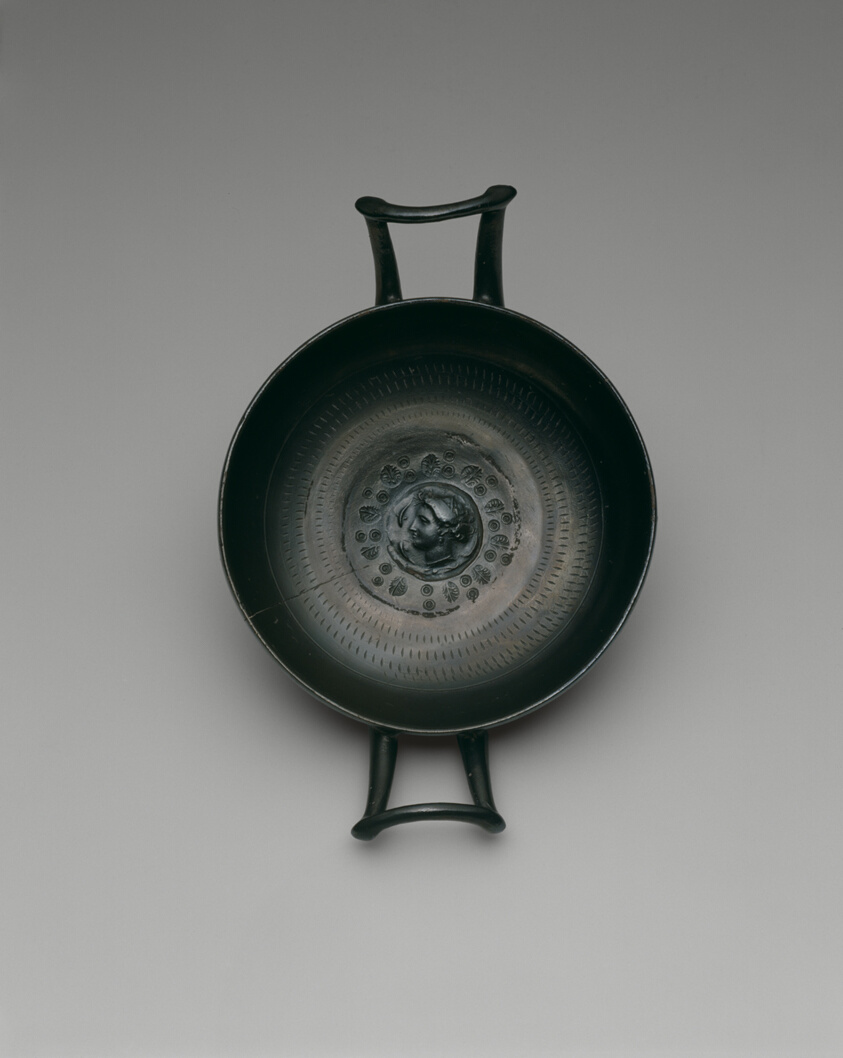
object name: Vessel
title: Stemless Kylix (Drinking Cup)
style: campanian, south italian, ancient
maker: Greek; Campania, Italy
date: 300-200 BCE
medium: terracotta, Calenian relief ware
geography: Cales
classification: drinking vessel; vessel; ancient art; container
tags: dining, drinking